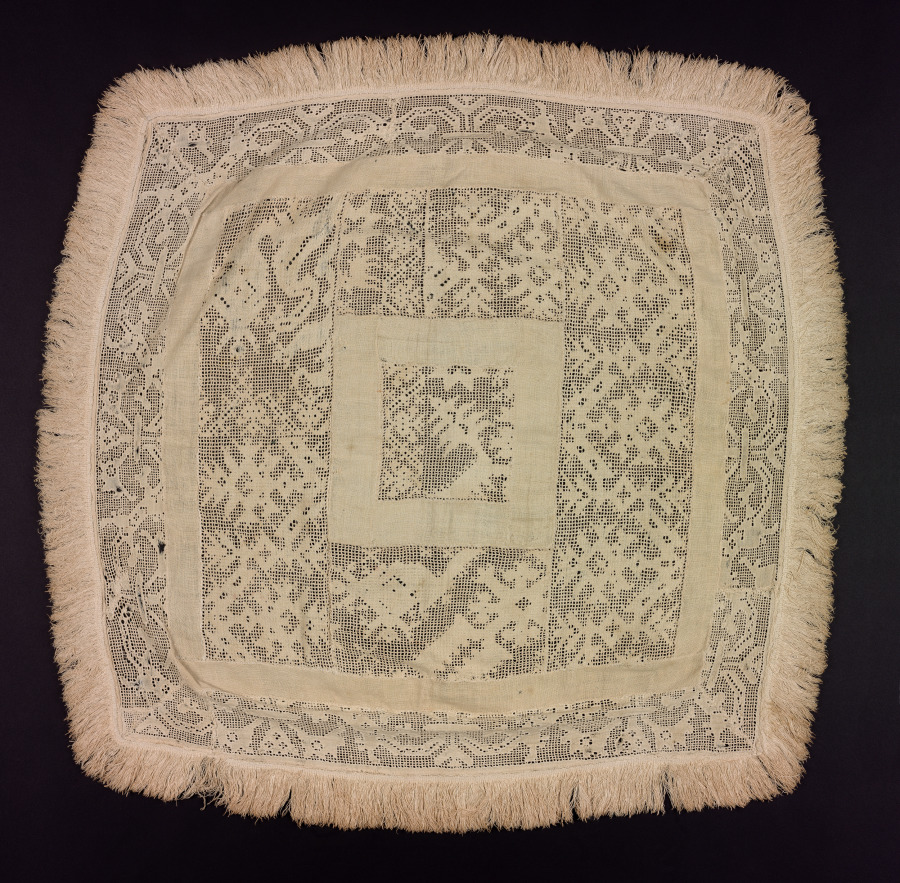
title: Lace Cloth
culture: Italy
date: 1800s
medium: Linen: needle lace (drawnwork)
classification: Lace